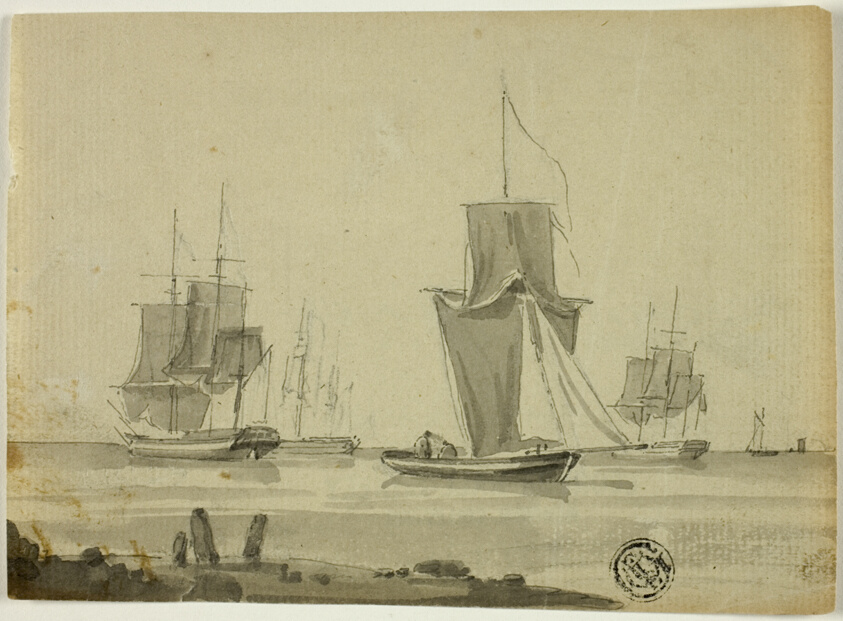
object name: Drawing and Watercolor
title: Boats at Sea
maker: Unknown Artist; Dutch, 17th-18th centuries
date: c. 1800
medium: Pen and brown ink, with brush and brown wash, over graphite, on cream laid paper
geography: Netherlands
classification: ink or chalk wash; drawings (visual works); prints and drawing